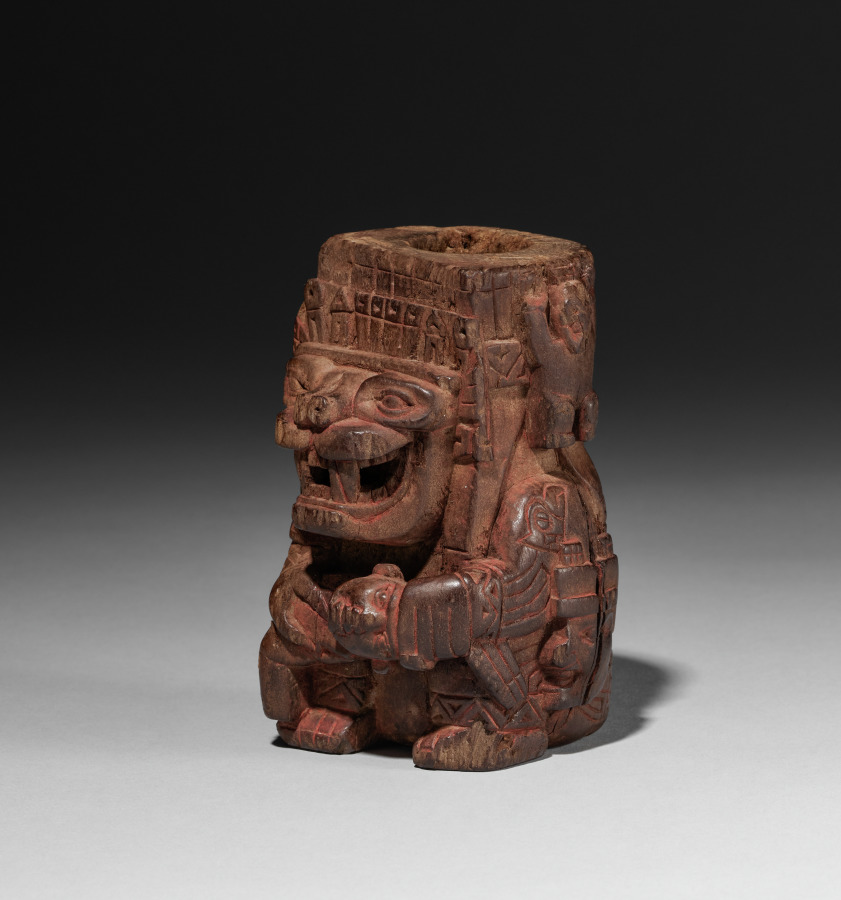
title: Container in the form of a Sacrificer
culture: Peru, Middle Horizon, Wari Culture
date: 770–890 (radiocarbon date, 95% probability)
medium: wood and red pigment (cinnabar)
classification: Wood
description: This container assumes the shape of a magnificent, feline-headed, supernatural sacrificer who draws a knife across the throat of the human it holds in its lap. Severed human heads hang from the feline's belt and dangle by the trachea at the back of its headdress. Sacrifice had a place in Wari religious practice, probably as an unusual and exceptionally precious offering made to entice the benevolence of cosmic forces. Indeed, colonial-period Andean people believed that death was a prerequisite for the renewal of the world.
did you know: Traces of cinnabar, a toxic mercuric sulfide, are visible on the container's surface.